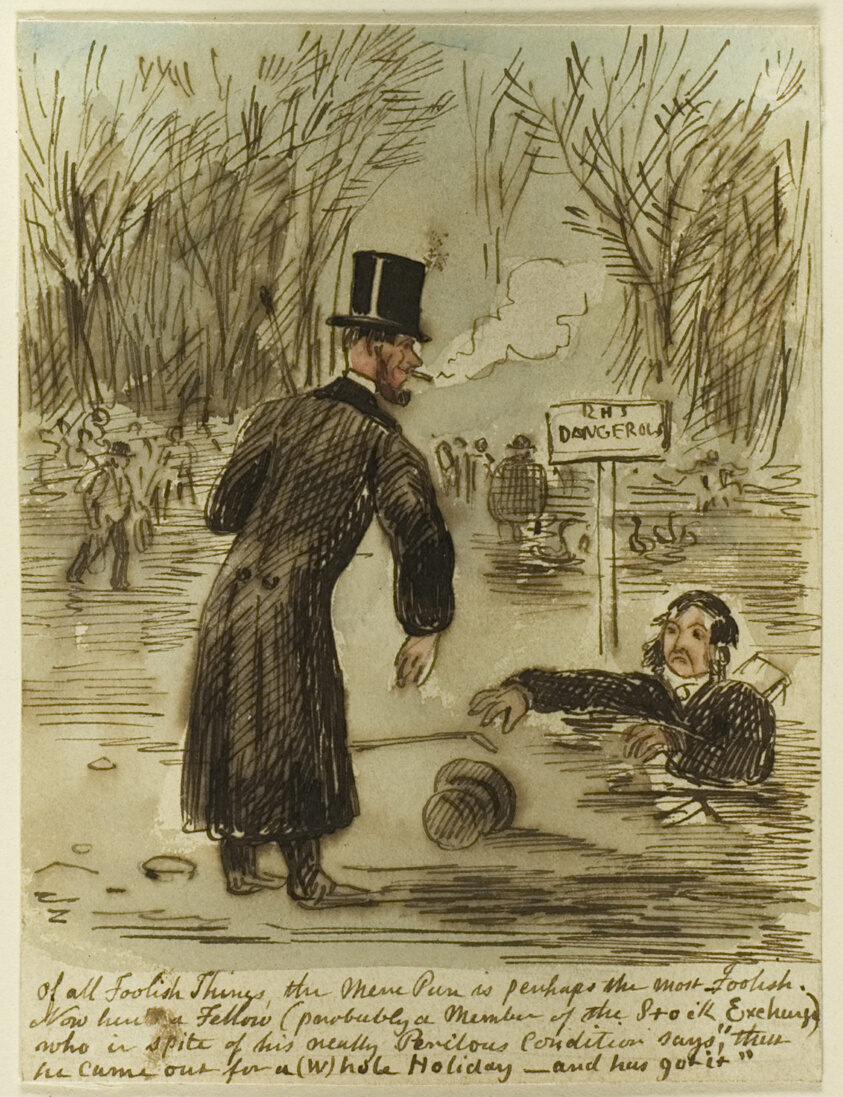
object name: Drawing and Watercolor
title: Of All Foolish Things...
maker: John Leech (English, 1817-1864)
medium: Watercolor and pen and brown ink, over graphite, on cream wove paper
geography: England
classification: watercolor; drawings (visual works); prints and drawing